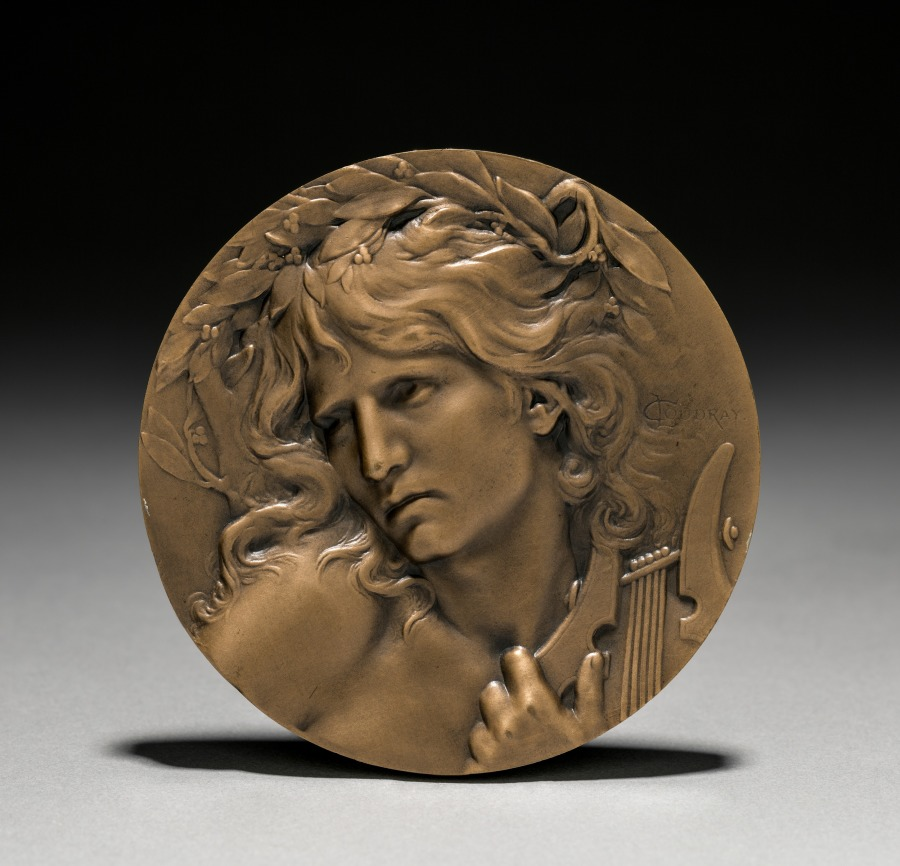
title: Medal Presented to Loïe Fuller by the French Government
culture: France, 19th century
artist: Marie Alexandre Lucien Coudray (French, 1864–1932)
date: 1900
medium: bronze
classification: Metalwork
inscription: on obverse: L. Coudray. on reverse: Loie Fuller. Inscribed on edge: "Bronze" with an unidentified emblem.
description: A temporary theater on the grounds of the 1900 Exposition Universelle was devoted to Loïe Fuller, who by that time had become a cultural icon. The theater’s interior was hung with draperies onto which a kaleidoscope of colors shone from stained glass windows and hidden lamps, evoking the diaphanous veils of her costumes. In the foyer was a gallery of paintings, drawings, and sculpture all depicting the dancer. Coudray’s medal, Orpheus at the Entrance to the Underworld, was struck to commemorate the world’s fair. This example of the famous Art Nouveau medal was engraved as a gift to Loïe Fuller.